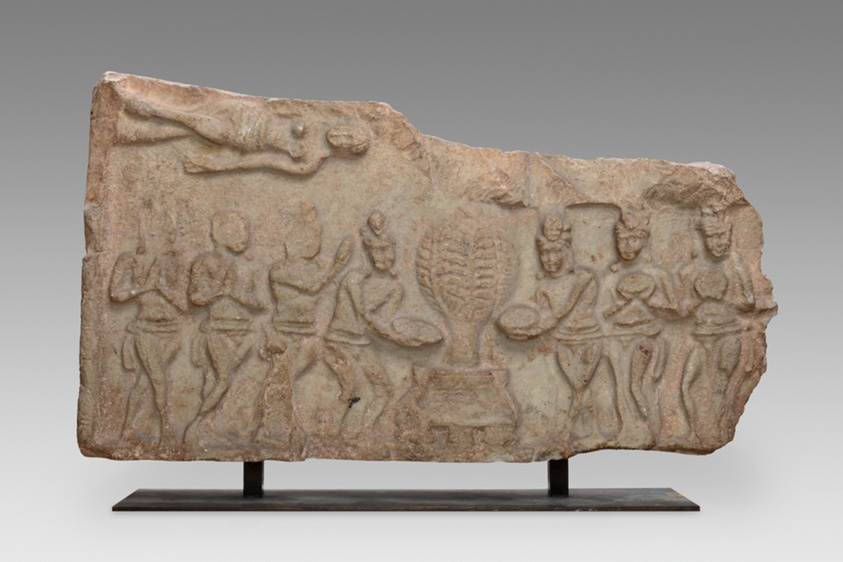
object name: Sculpture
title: Veneration of the Bodhi Tree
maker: India; Andhra Pradesh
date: 3rd century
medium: Limestone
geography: Nagarjunakonda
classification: stone; sculpture; asian art